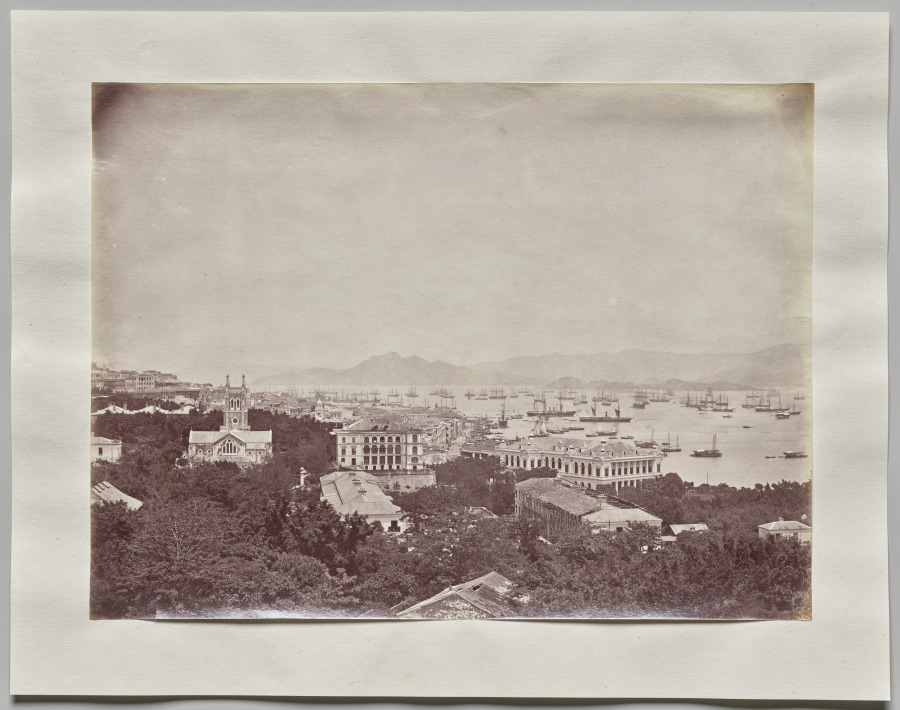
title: Untitled (General view of Hong Kong from the Scandal Point looking west)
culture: England, 19th century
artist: William Pryor Floyd (British, 1834–c. 1900)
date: 1866–73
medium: albumen print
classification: Photograph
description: Hong Kong’s growth, coupled with the heavy traffic of visitors brought by maritime commerce, attracted numerous foreign and Chinese photographers who documented the city’s dramatic and rapid urbanization. The main customers for such views were Westerners—colonists, sailors, merchants, and visitors—rather than Chinese. In this view, the City Hall and St. John’s Cathedral tower over the harbor full of ships in the background.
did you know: Hong Kong, a relatively barren island when ceded to the British in 1842, rapidly evolved from a free port to a British crown colony and mercantile center.